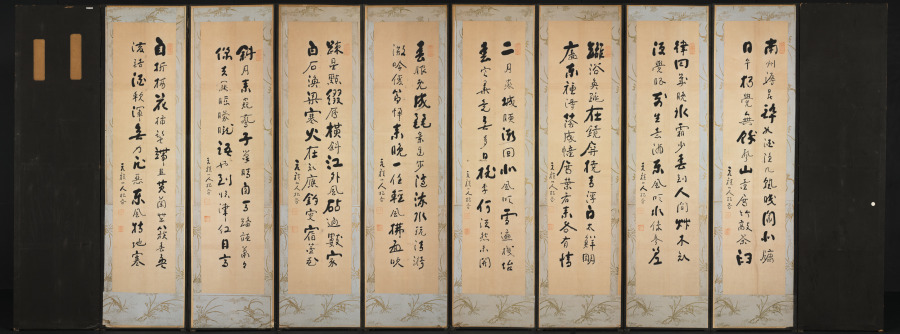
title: Calligraphy (reverse)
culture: Korea, Joseon dynasty (1392–1910)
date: late 1800s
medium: Ten-panel folding screen affixed with album leaves (obverse), calligraphy (reverse), ink and color on silk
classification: Painting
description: The front of this screen features an assortment of subjects: birds and flowers, landscapes, and scenes of everyday life, mostly in monochromatic ink with light colors. The screen’s reverse side conveys a number of classical poems about the fleeting beauty of the four seasons. Traditionally, only one side of a folding screen bears painted or embroidered images, since these were used as a background furnishing. In Korean houses by the 1800s and early 1900s, however, two-sided folding screens became noticeably popular, possibly inspired by Japanese double-sided folding screens, which mainly served as room dividers in Japanese households.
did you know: A calligrapher has brushed several Chinese poems about the four seasons on the reverse side, among them "Composing in the Daytime of Summer" by Tang poet Liu Zongyuan (773–819) and "Composing when Spring Begins" by Song scholar Zhang Shi (1133–1180).